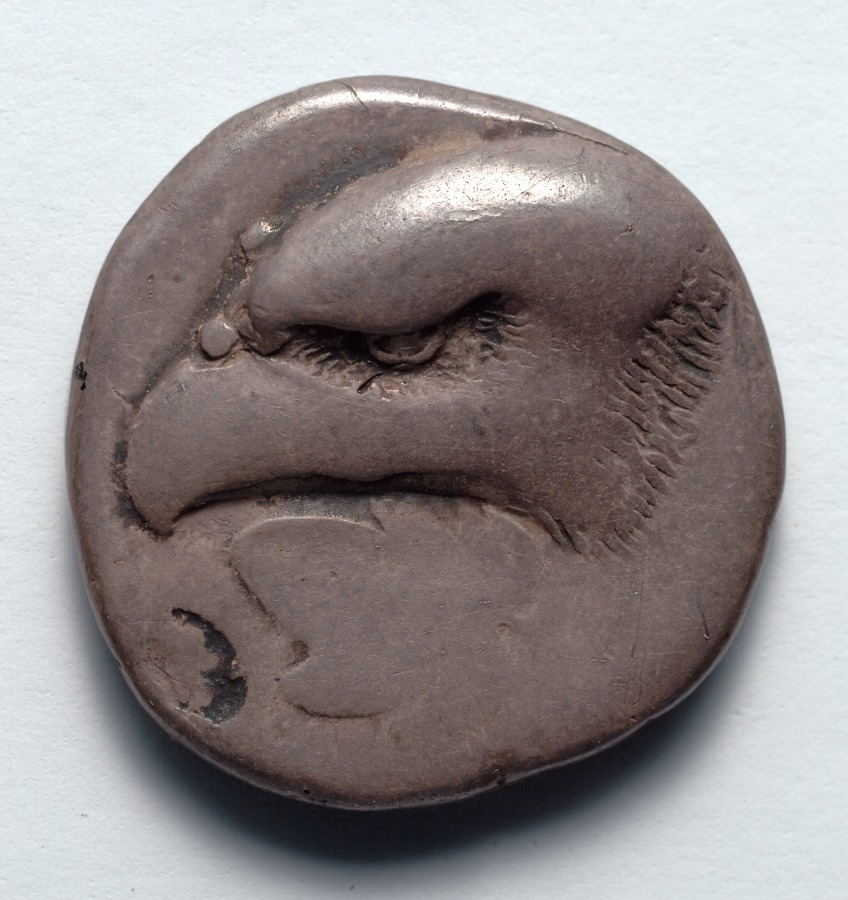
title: Stater: Head of Eagle (obverse); Thunderbolt (reverse)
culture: Greek, probably minted at Elis (Elis)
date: c. 400 BCE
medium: silver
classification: Coins